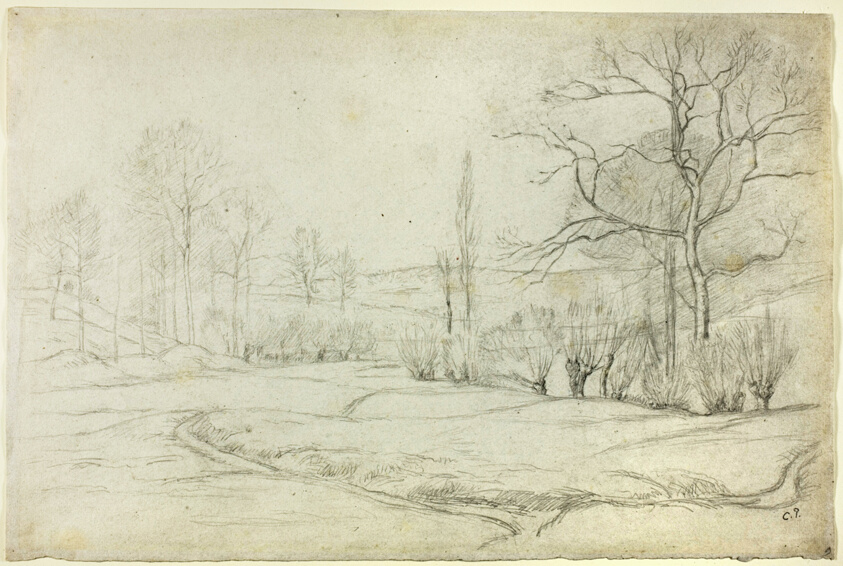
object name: Drawing and Watercolor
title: Landscape in Montfoucault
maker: Camille Pissarro (French, 1830-1903)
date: 1864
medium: Graphite on light gray laid paper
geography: France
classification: graphite; drawings (visual works); prints and drawing